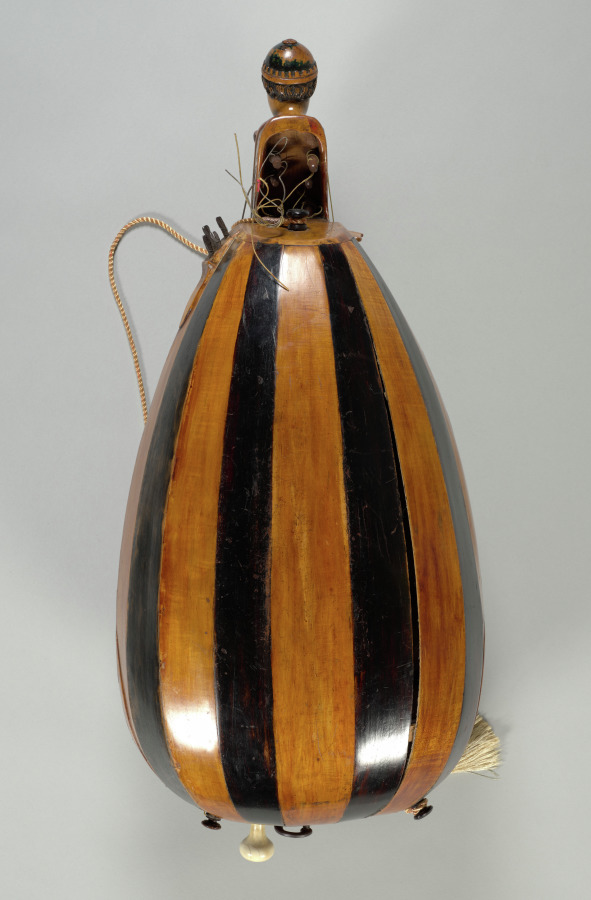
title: Vielle à Roue (Hurdy-Gurdy)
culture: France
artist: Jacques Decante (French, 1808–1884)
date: 1865–70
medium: Wood; mother-of-pearl inlay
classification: Musical Instrument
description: In France, the hurdy-gurdy is known as the vielle à roue (wheel fiddle). This six-stringed musical instrument produces sound by a hand crank-turned wheel that rubs against the strings. The wheel functions much like a violin bow, and single notes sound similar to those of a violin. Melodies are played on a keyboard that presses small wedges against the strings to change their pitch.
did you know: This vielle à roue was made in the French village of Jenzat, which was the manufacturing center for hurdy-gurdies during the 19th century.